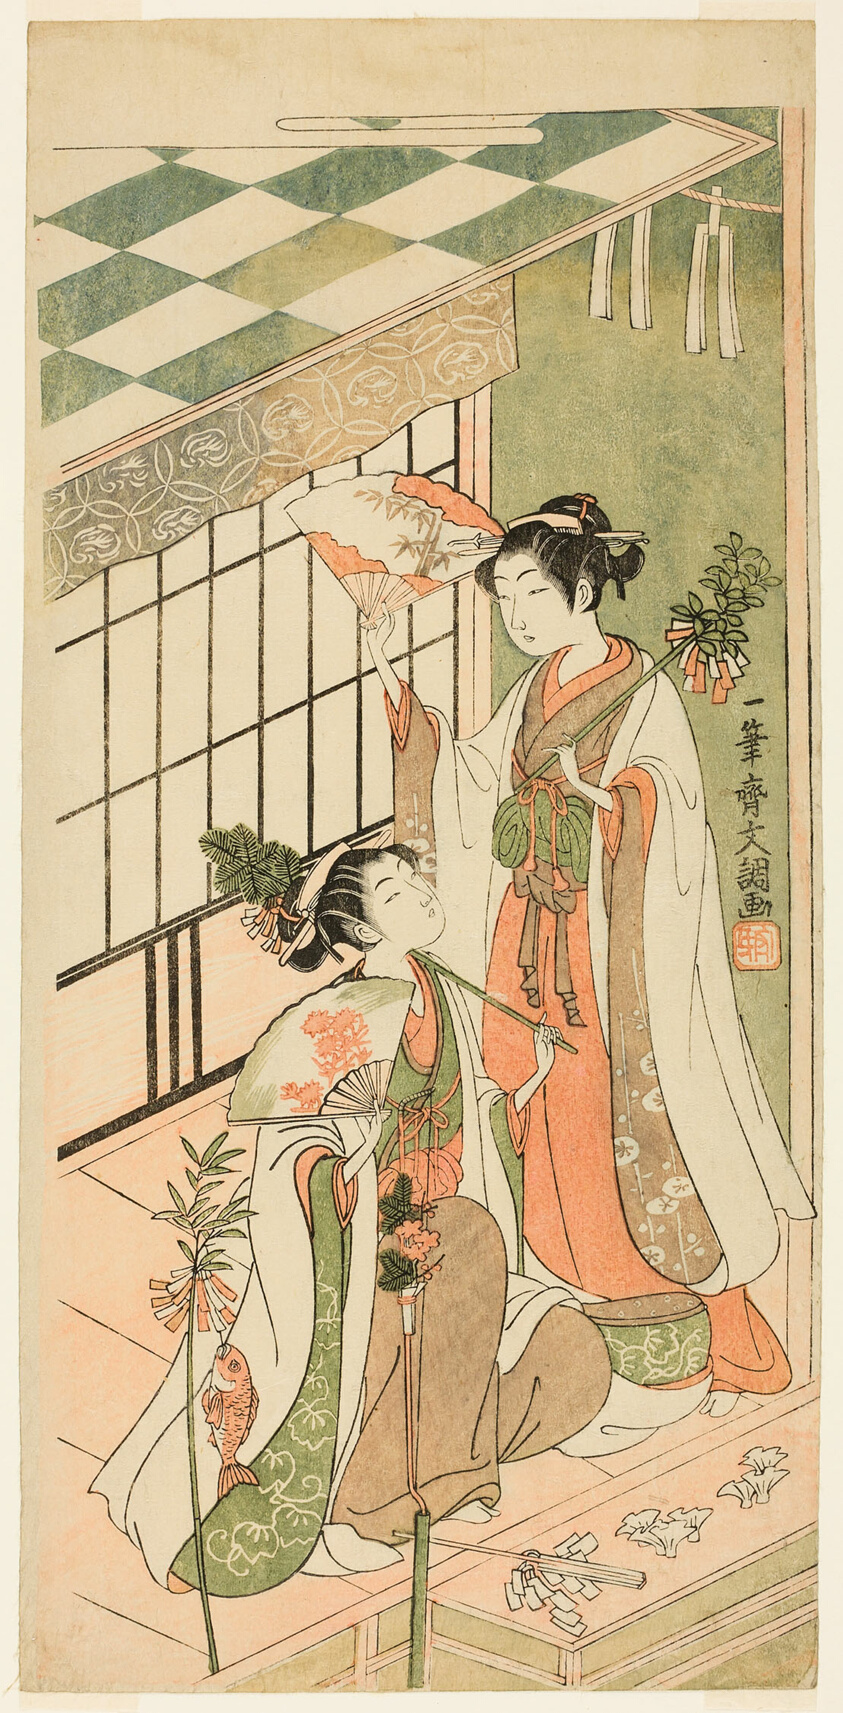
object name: Print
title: The Shrine Dancers (Miko) Ohatsu and Onami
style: Japanese (culture or style)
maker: Ippitsusai Buncho (Japanese, active c. 1755-90)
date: 1769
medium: Color woodblock print; hosoban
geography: Japan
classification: woodblock print; print; asian art